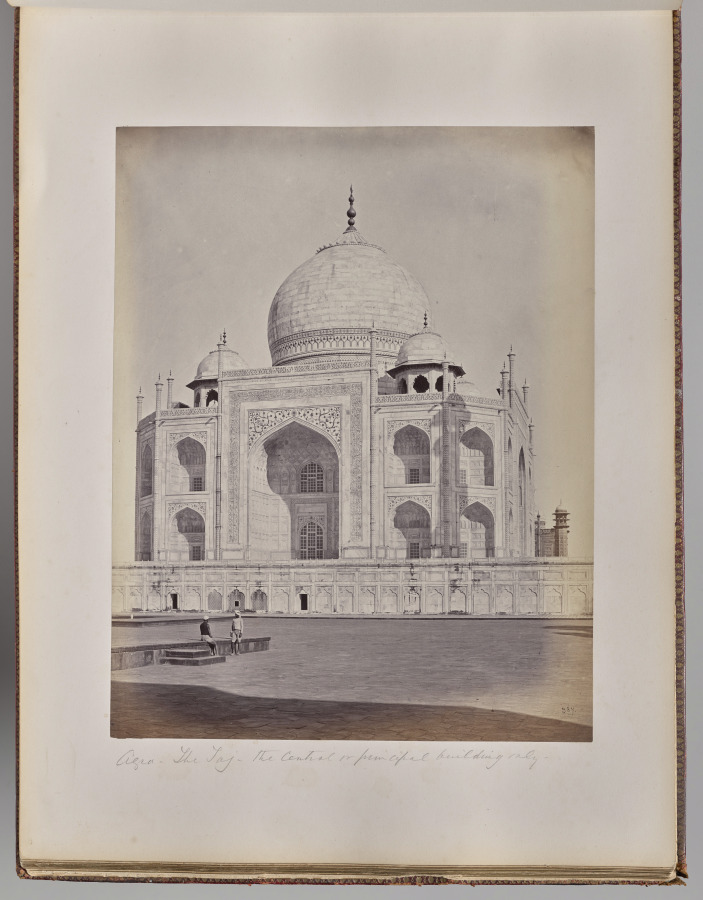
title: Agra. The Taj, the Central of Principal City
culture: England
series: Photographs of Northern India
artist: Samuel Bourne (British, 1834–1912)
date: 1863–70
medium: albumen print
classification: Photograph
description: The 50 images in this album, all taken in the 1860s, move from the hill towns of the Himalayas down to cities including Lahore (now in Pakistan), Delhi, Lucknow, Agra, Benares (now Varansi), and Calcutta (now Kolkata). Architectural studies of major monuments offer valuable historical records of what sites such as the Taj Mahal and the imperial mosque of the Mughal emperors in Delhi looked like before twentieth-century restorations.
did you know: Samuel Bourne, the author of most the images in this album, was a banker in England before he moved to India to become a professional photographer.